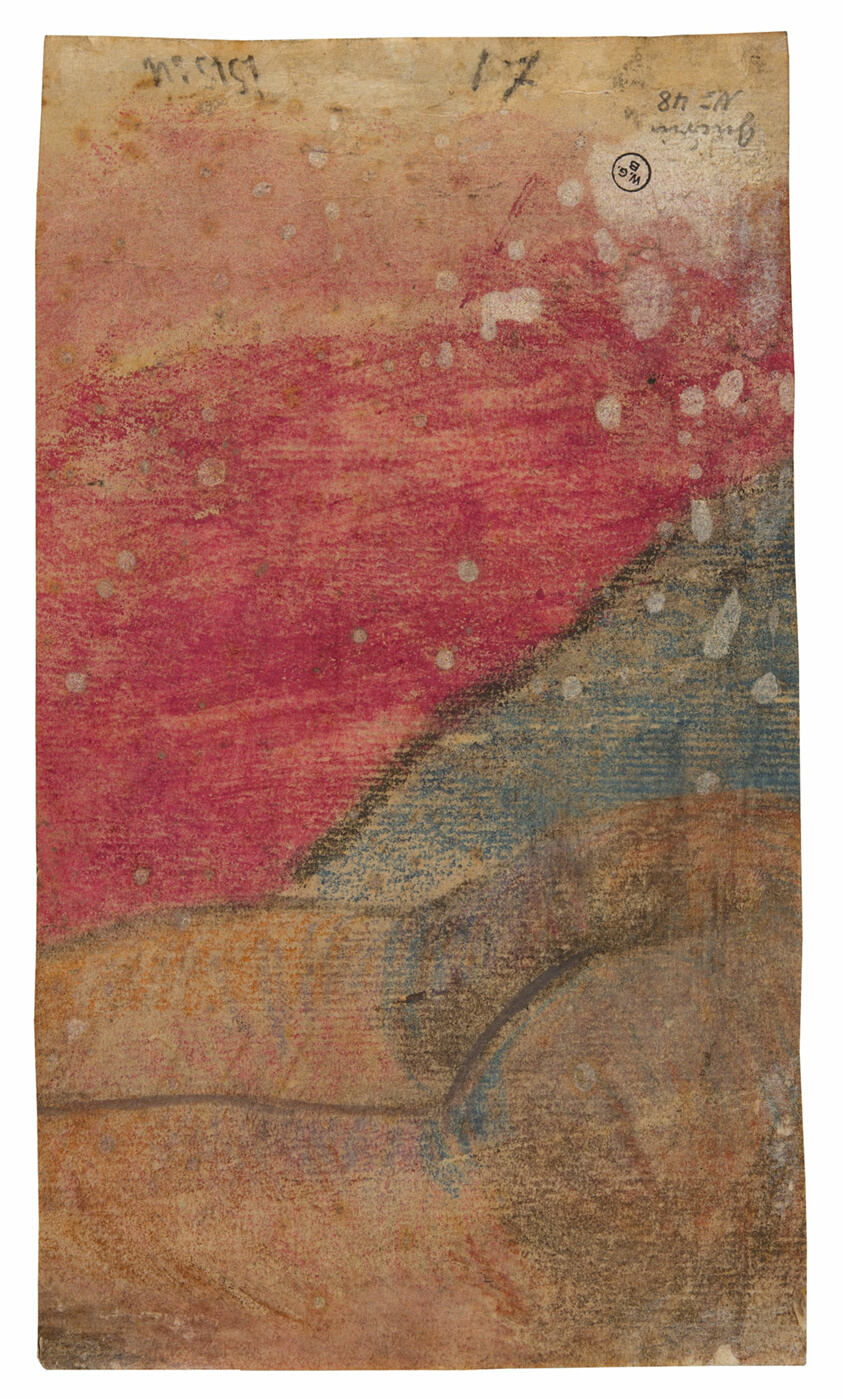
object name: Drawing and Watercolor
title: Reclining Tahitian (fragment)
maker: Paul Gauguin (French, 1848-1903)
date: 1894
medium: Pastel monotype, with touches of pastel, on cream wove Japanese paper, laid down on cream wove Japanese paper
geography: France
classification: monotype; prints and drawing; paper; drawings (visual works)